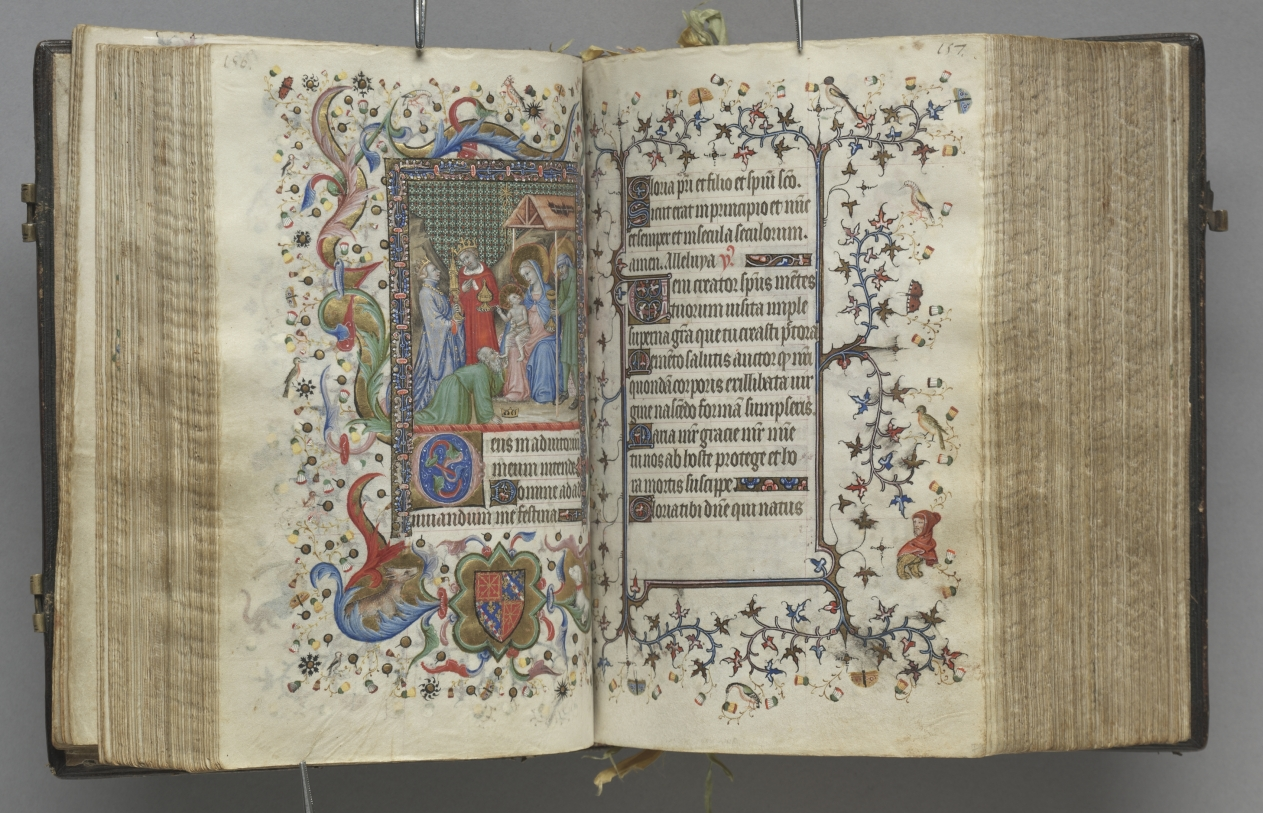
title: Hours of Charles the Noble, King of Navarre (1361-1425): fol. 78v, Adoration of the Magi (Sext)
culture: France, Paris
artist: Master of the Brussels Initials and Associates (French)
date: c. 1405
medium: ink, tempera, and gold on vellum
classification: Bound Volume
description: This precious volume was obviously highly prized by its owner, the French-born King of Navarre, who had his coat of arms painted on no less than twenty folios. Rather than directly commissioning this manuscript from a specific workshop, it seems that Charles the Noble acquired his book of hours -- perhaps ready-made for the luxury market -- while on a trip to Paris in 1404-05. A collaborative effort, six painting styles are evidenced within the pages of this codex, those of two Italians, two Frenchmen, and two Netherlanders. The painter who was responsible for the planning and decoration of the book, and who produced seventeen of the large miniatures, was a Bolognese artist known as the Master of the Brussels Initials. His principal assistant, responsible for most of the borders, was a Florentine who signed his name "Zecho" da Firenze on folio 208 verso.